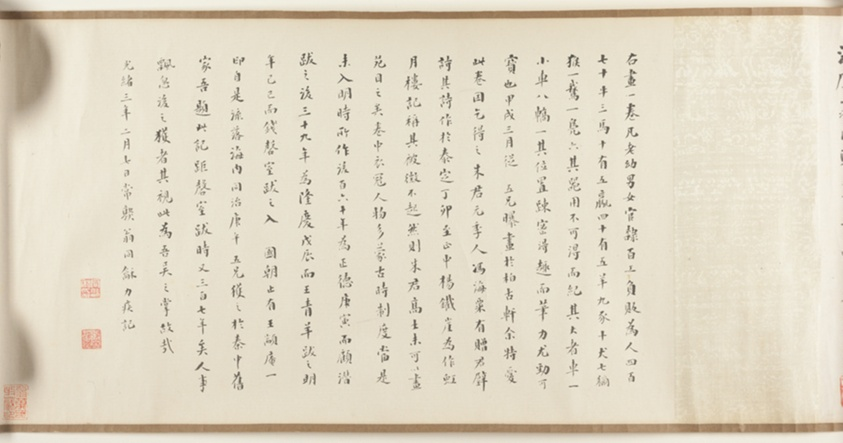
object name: Painting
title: Street Scenes in Times of Peace 太平風會圖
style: Chinese (culture or style)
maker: Zhu Yu (Zhu Junbi) 朱玉（朱君璧）; Chinese, 1293-1365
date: Yuan dynasty (1279–1368), 14th century 元朝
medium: Handscroll; ink and colors on paper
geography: China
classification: handscroll; painting; asian art